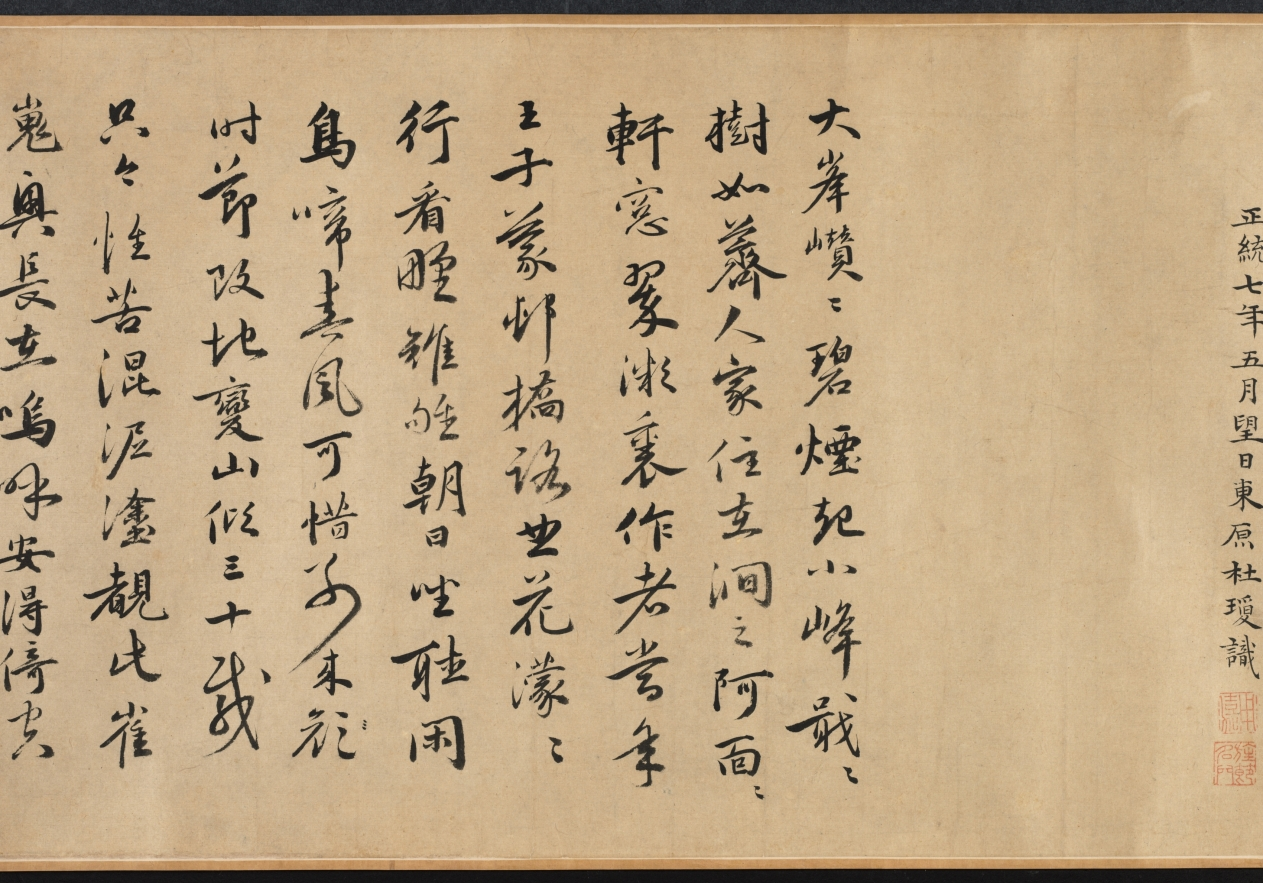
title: Mt. Taibo in the Style of Wang Meng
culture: China, Ming dynasty (1368–1644)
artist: Du Qiong (Chinese, 1396–1474)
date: 1442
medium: handscroll; ink and light color on paper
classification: Painting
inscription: Artist's inscription, signature, and 11 seals: [1 seal] Tung-yüan chai. Huang-ho-shan-ch'iao [Wang Meng] painted a painted called T'ai-po Mountain. Its brushwork is superior and admirable, which is very close to Yu-ch'en [Wang Wei, 699-759]. The cleverness of its composition, the maple groves and rustic temples, the inaccessible ravines and autumnal plateaus, the periolous peaks and strange rocks, etc., all seem to be so natural. The paper is only a little over eight feet, but the landscape has the range of a thousand miles. Once you open and note the contents, it is as if one were roaming among the mountain peaks enveloped in mist and clouds, and forgot the dusty world. When I first saw this, I was so mixed with excitement and joy that I could not take my hands off the painting. So I put it on the table, and tried my best to imitate it, forgetting sleeping and eating for about three months before it was completed. Although I do not dare to tread in the footsteps of Huang-ho shan ch'iao, I took great pains to capture his spirit in composition and colors. I do not know whether it would pass the judgment of the experts. On the fifteenth day of the fifth month, the seventh year of the Cheng-t'ung year [1442], inscribed by Tung-yüan, Tu Chiung. [2 seals] Yung-chia; Ching-chieh ming-men. [8 seals on painting] Tung-yüan chai; Ching-chieh ming-men; Yung-chia; Tu Ch'iung yin; Tung-yüan (repeated 5 times). trans. WKH/LYSL 3 colophons and 7 additional seals: 1 colophon and 2 seals of Chou Ting (1401-1487); 1 colophon and 2 seals of Wu K'uan (1435-1504); 1 colophon, dated 1655, and 2 seals of Lan Ying (1585-after 1664).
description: When a Chinese painter "imitated" a painting by a past master, the intention was never to produce an exact copy. Du Qiong, the Ming painter from Suzhou, is a case in point. The painting style of this handscroll is actually closer to that of Huang Gongwang (1269–1354) than to the style of Wang Meng (about 1301–1385). Both masters were active during the previous dynasty and are among the so-called Four Great Masters of the Yuan dynasty (1279–1368). In this painting, the interplay of styles, including Du Qiong's own, contribute to an inner dimension that is more than visual. Mt. Taibo is located in the province of Zhejiang and is known for its scenic beauty. In this scroll, however, it is not depicted literally. The image is an ideal representation of mountains in southeastern China.